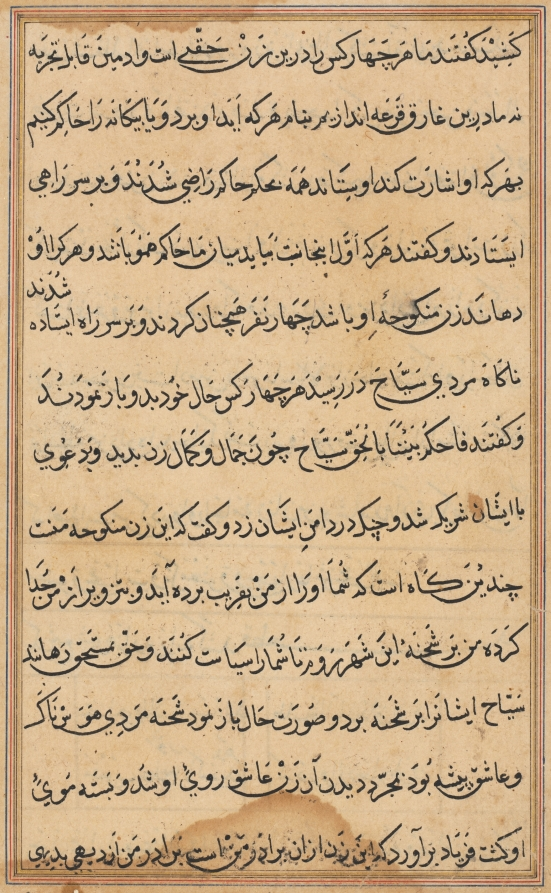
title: Page from Tales of a Parrot (Tuti-nama): text page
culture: Mughal India, court of Akbar (reigned 1556–1605)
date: c. 1560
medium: gum tempera, ink, and gold on paper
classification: Painting